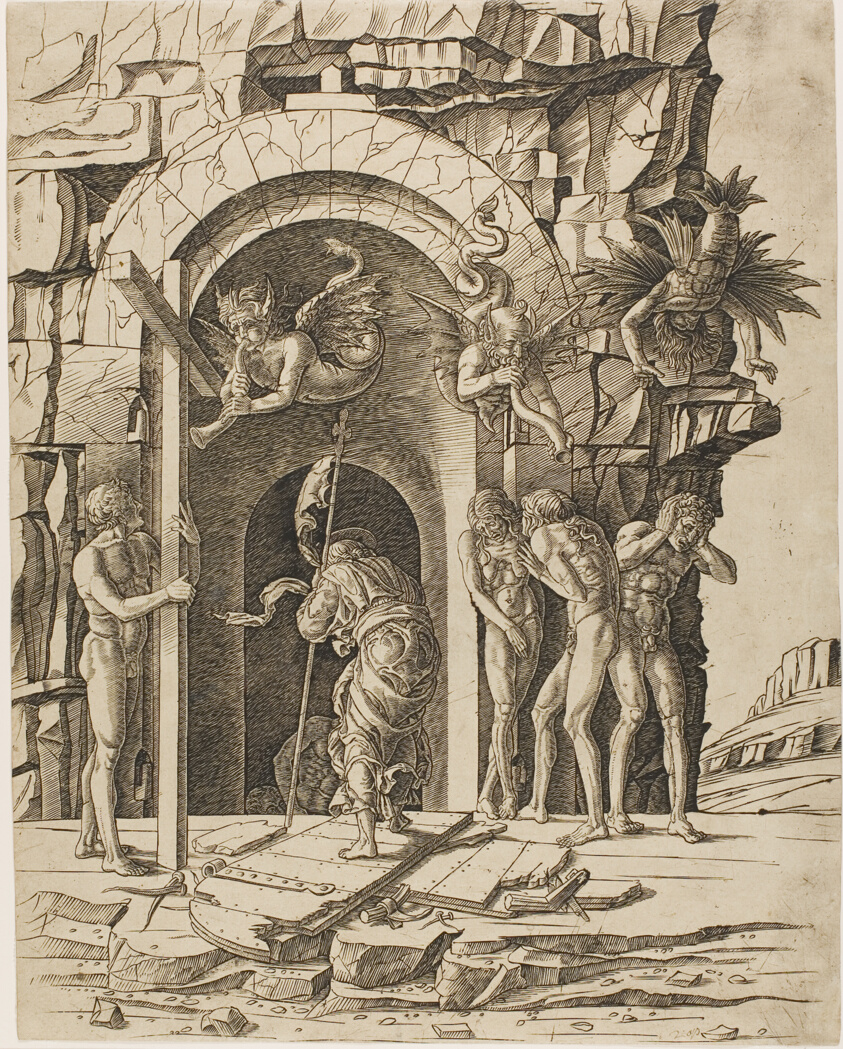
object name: Print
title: Descent into Limbo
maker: Workshop of Andrea Mantegna; Italian, 1431-1506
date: 1475/80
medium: Engraving in black ink on cream laid paper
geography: Italy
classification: engraving; print; prints and drawing